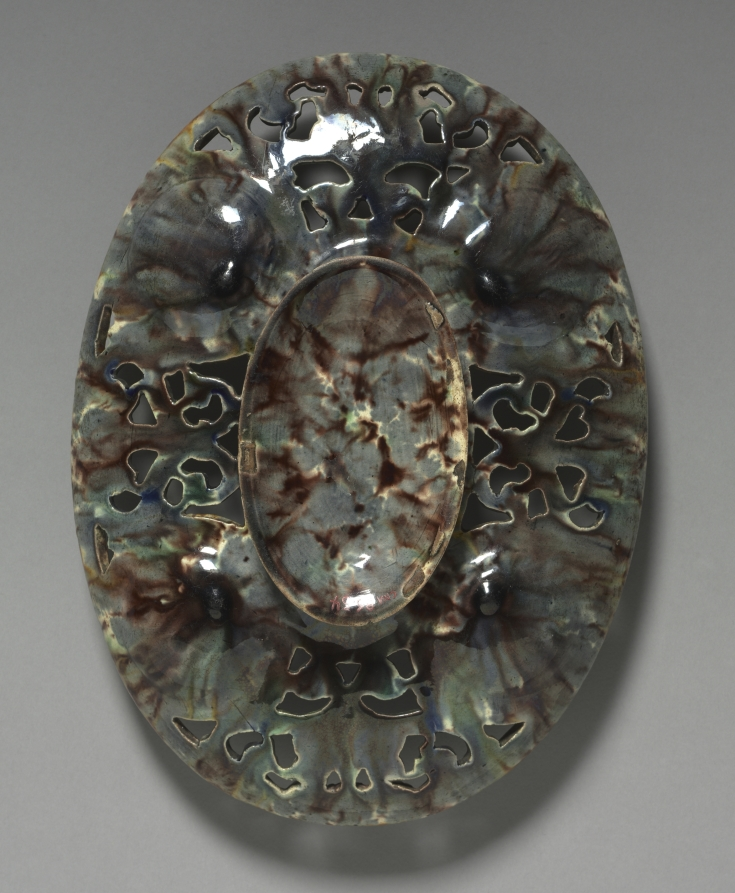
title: Oval Dish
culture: France, 16th century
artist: circle of Bernard Palissy (French, 1510–1589)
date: late 1500s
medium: earthenware and lead glazes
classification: Ceramic